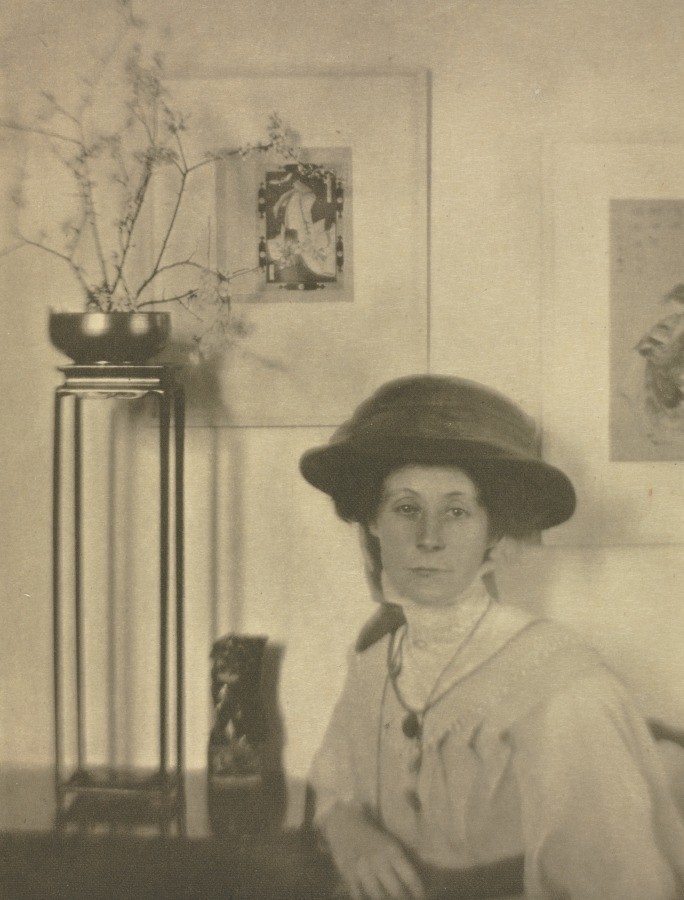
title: Camera Work: East and West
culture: England, 20th century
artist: J. Craig Annan (British, 1864–1946)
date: 1910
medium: photogravure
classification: Bound Volume